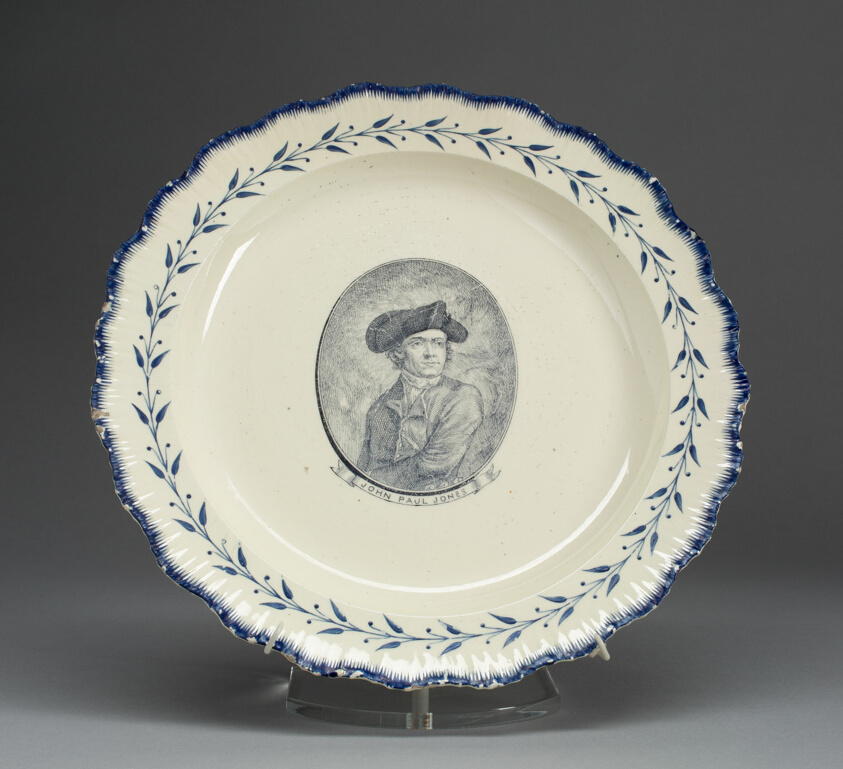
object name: Decorative Arts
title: Plate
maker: English for the American market; Leeds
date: c. 1790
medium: Creamware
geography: England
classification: plate (general, dish); tableware; american decorative arts; porcelain; european decorative arts; ceramics; decorative arts